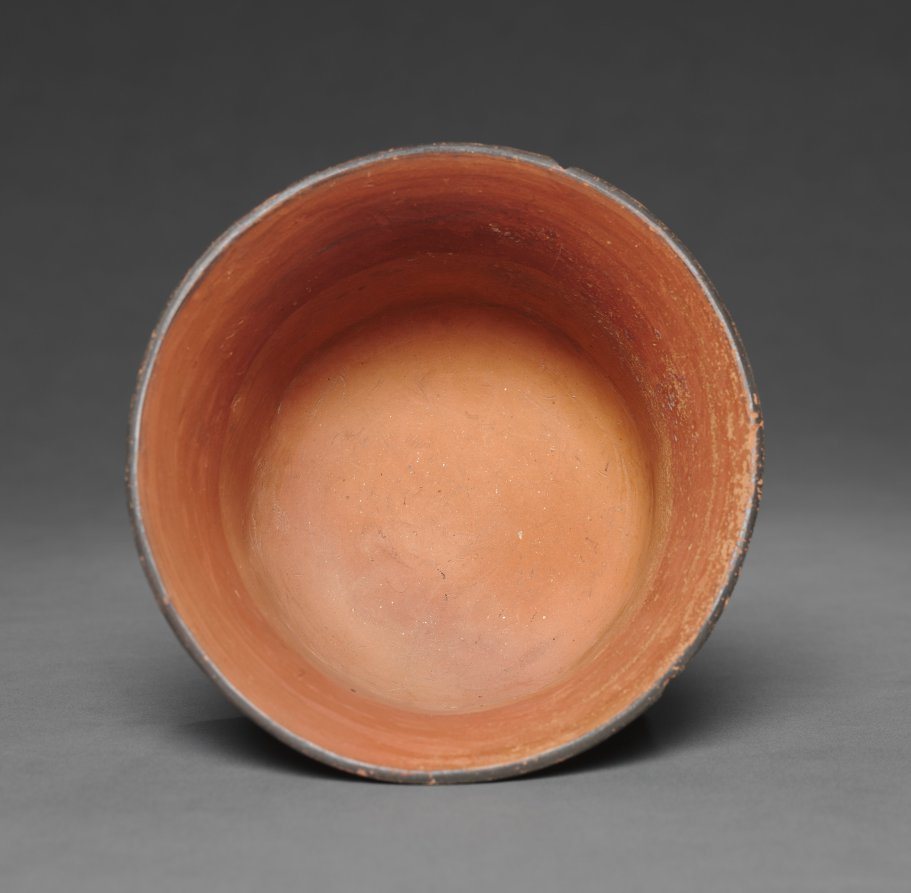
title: Bowl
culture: Peru, South Coast, Nasca, Florescent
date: 100 BCE–700 CE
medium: earthenware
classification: Ceramic